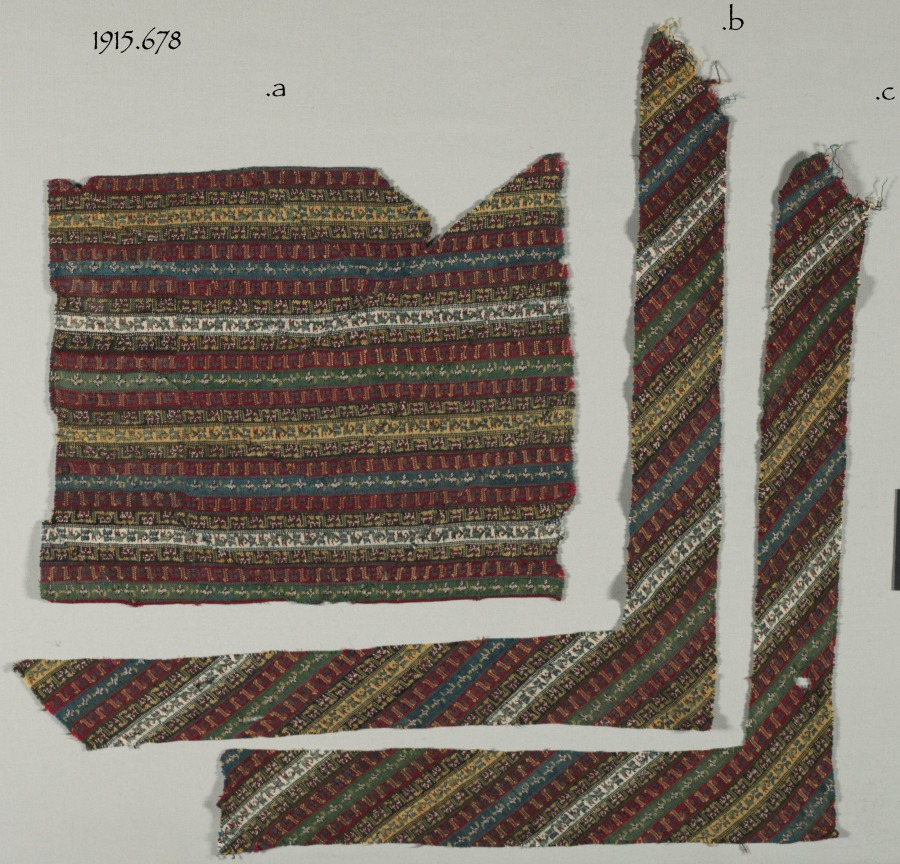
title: Fragments of a Shawl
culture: India, Kashmir, 19th century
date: 19th century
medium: twill weave, brocaded; wool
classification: Textile